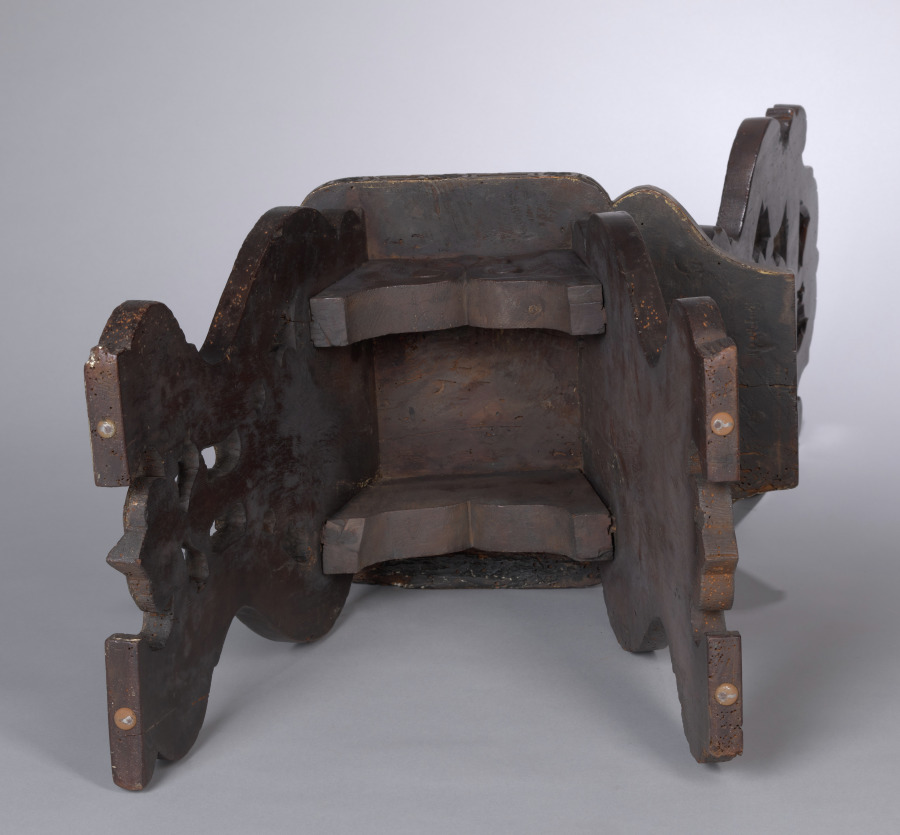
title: Chair, Sgabello type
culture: Italy, late 16th century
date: late 1500s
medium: walnut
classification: Furniture and woodwork